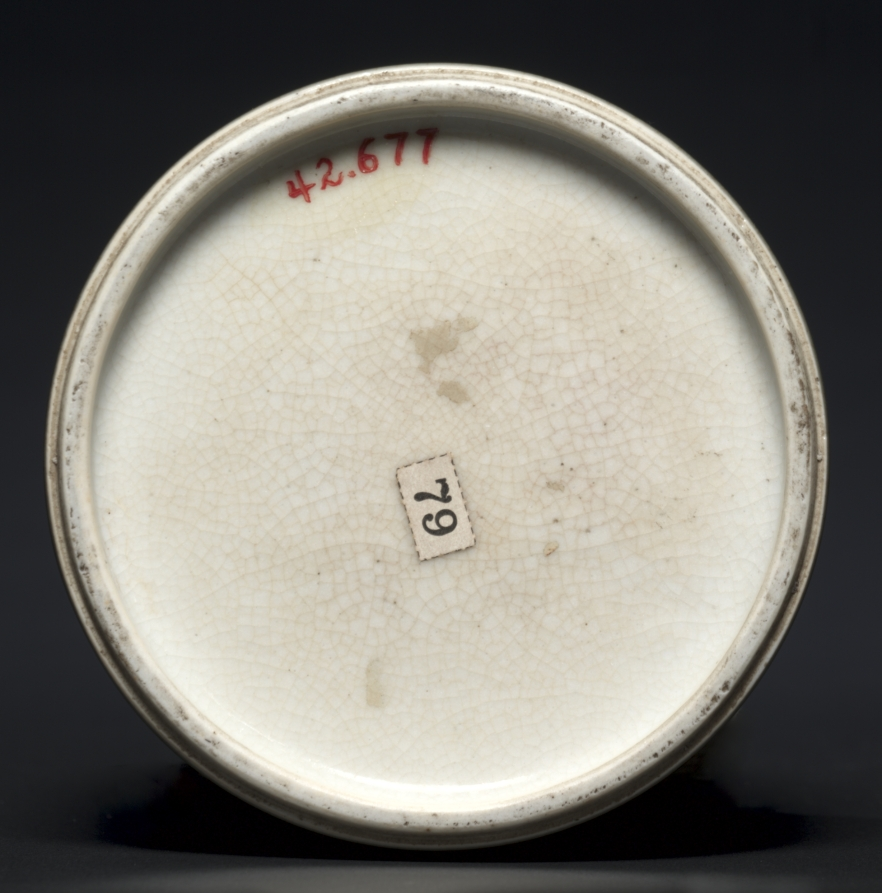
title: Bell-shaped Bottle: Lang Ware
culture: China, Qing dynasty (1644-1911), Kangxi reign (1661-1722)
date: 1662–1722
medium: porcelain with red copper glaze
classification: Ceramic